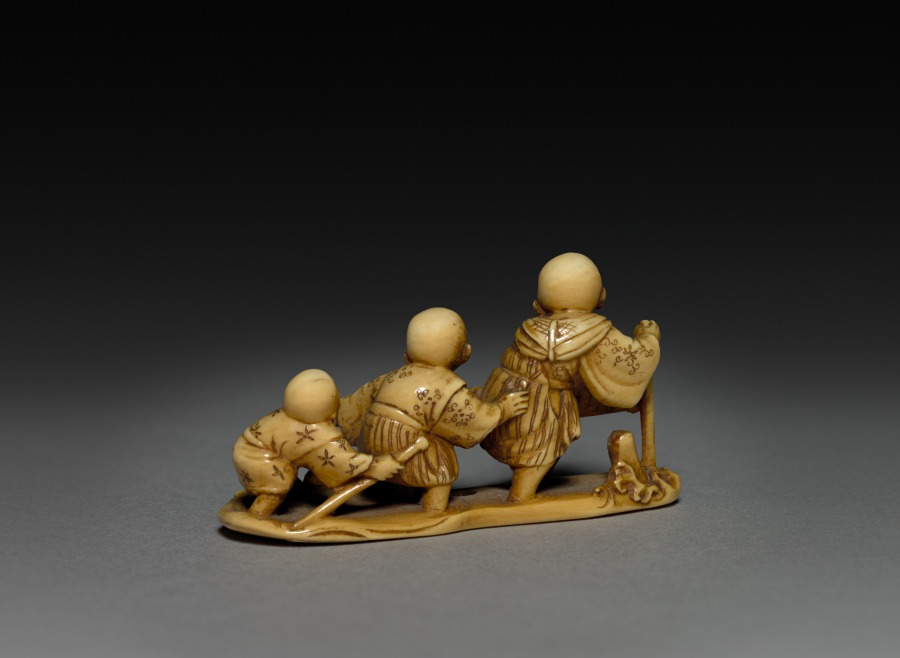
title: Three Figures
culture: Japan, Meiji period (1868–1912)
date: early 1900s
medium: ivory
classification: Ivory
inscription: 古川